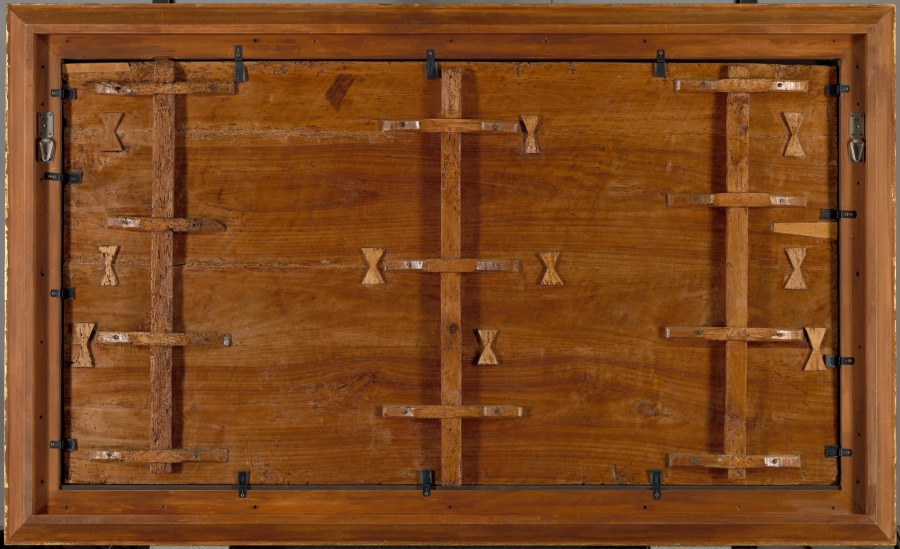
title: Christ with Joseph of Arimathea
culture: Italy, 16th century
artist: Giovanni Girolamo Savoldo (Italian, c. 1480–after 1548)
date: c. 1525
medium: oil on wood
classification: Painting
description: After the Crucifixion, Joseph of Arimathea obtained permission to bury Christ’s body in Joseph’s own tomb. Aside from an amorphous, cloudy sky, Savoldo eliminated the background entirely and reduced the narrative to two monumental figures, brought to the front of the picture plane. These qualities surely had a great impact on Caravaggio, who initially trained in Northern Italy, where Savoldo spent his career. This work originally hung over a large altarpiece, which explains the unusual perspective, the panel’s horizontal shape, and the figures’ position above the viewer.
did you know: This panel originally crowned the largest painting Savoldo ever made for a public setting.